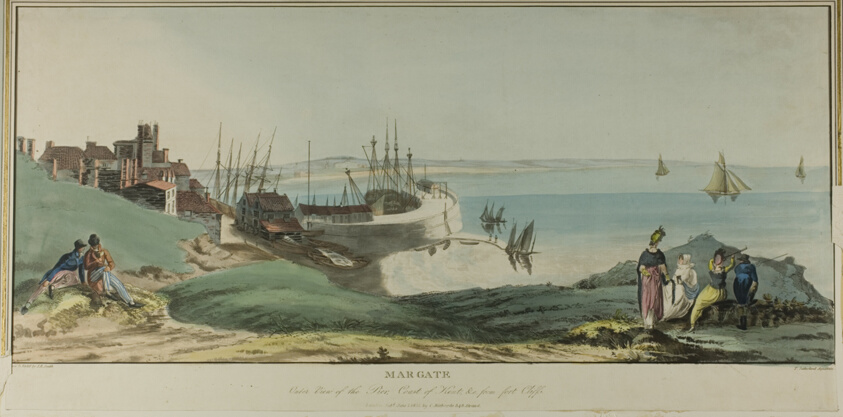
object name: Print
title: Margate, Outer View of the Pier, Coast of Kent, and from Fort Cliffs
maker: John Raphael Smith (English, 1751-1812); acquaint by Thomas Sutherland (English, c. 1785-1838); published by Charles Richards (English, active 1804-1806)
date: published June 1, 1805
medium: Hand-colored etching and acquaint on ivory wove paper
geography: England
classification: aquatint; print; prints and drawing